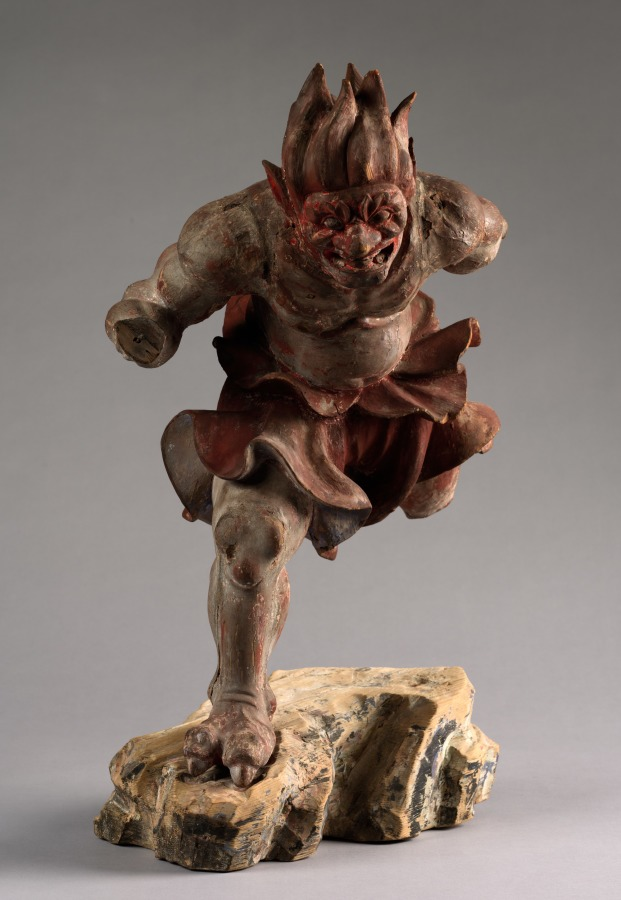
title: Thunder God (Raijin)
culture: Japan, Kamakura period (1185–1333)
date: 1300s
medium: wood with traces of gesso and red and black pigment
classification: Sculpture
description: The Thunder (Raijin) and Wind (Fujin) gods first appeared in early Buddhist art in China and Japan and were based on the popular imagery in India that was derived from the life of the historical Buddha, Shakyamuni. They were shown among a group of demon-monsters flying through the sky above the meditating Shakyamuni in an attempt to frighten away his concentration. Raijin is surrounded by a ring of small drums struck by a stick held in his hand so that he is always accompanied by a thunderous noise. A metal clasp protruding from this sculptures' back indicates that a ring of drums was once attached to the Cleveland Raijin. The matching sculpture, Fujin, is in the Fukuoka Art Museum in Japan.